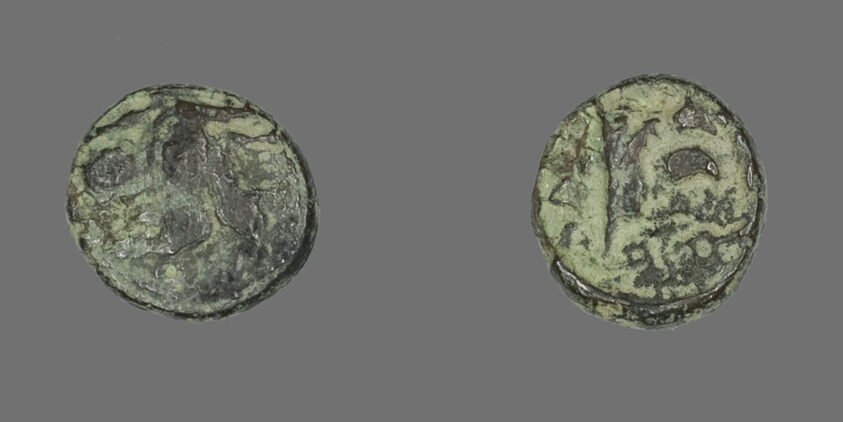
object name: Coin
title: Coin Depicting a Sphinx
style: greek, ancient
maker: Greek, possibly minted in Chios, Ionia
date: 301-109 BCE (?)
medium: Bronze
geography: Ancient Greece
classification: coin; ancient art